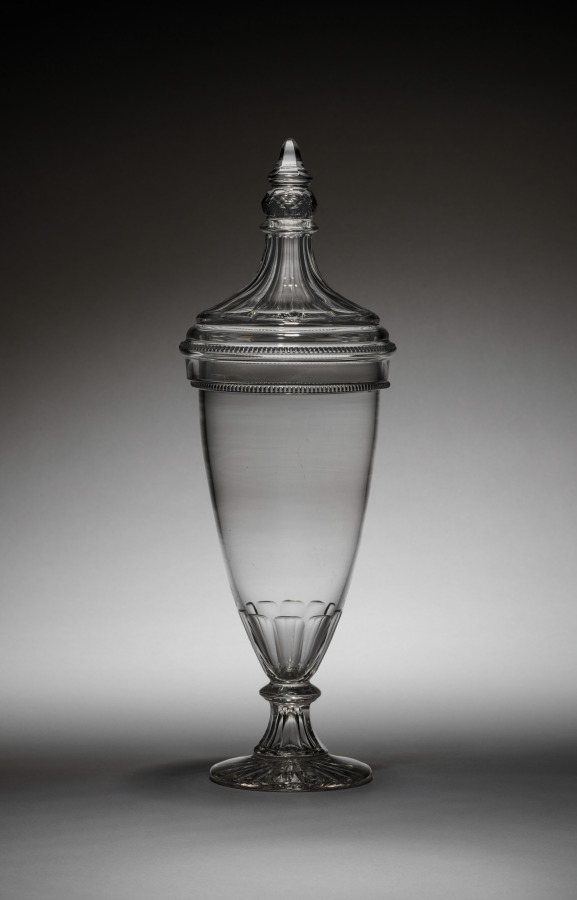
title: Candy Jar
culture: America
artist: firm of Christian Dorflinger (American, 1828–1915)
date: 1869–1880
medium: glass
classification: Glass